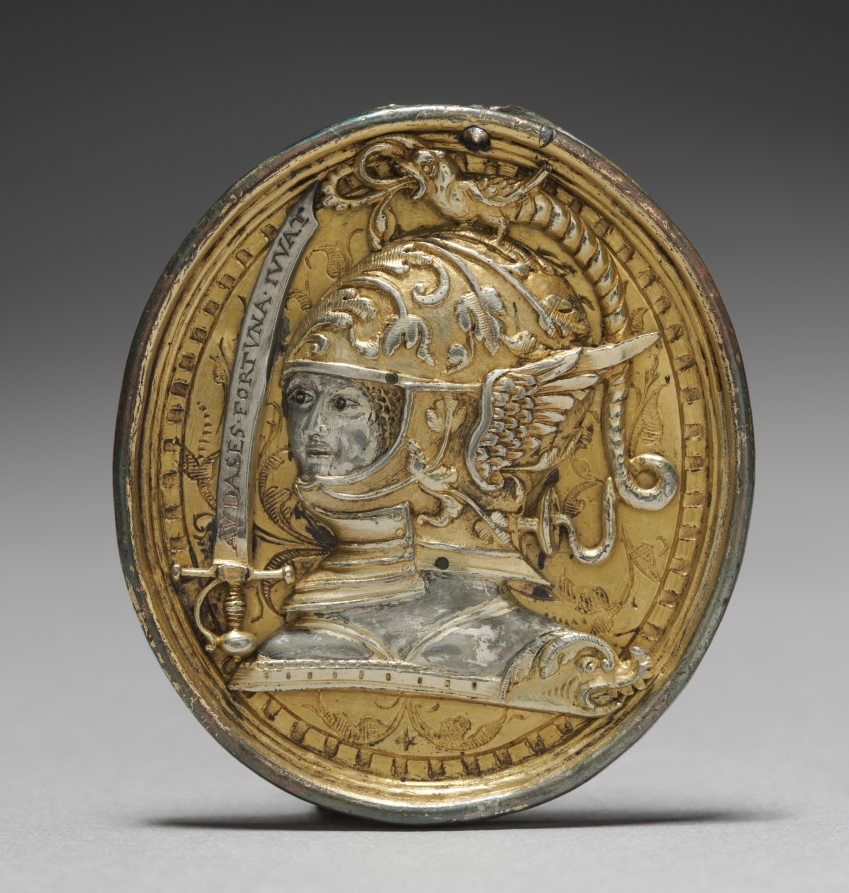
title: Portrait of Archduke Charles of Styria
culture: Austria or South Germany, 16th century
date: c. 1564–70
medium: silver, gilt silver, and gilt copper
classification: Sculpture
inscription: raised sword inscribed with: AVDASES ° FORTVNA ° IVVAT (Fortune assists the brave), the personal motto of Archduke Charles of Syria.